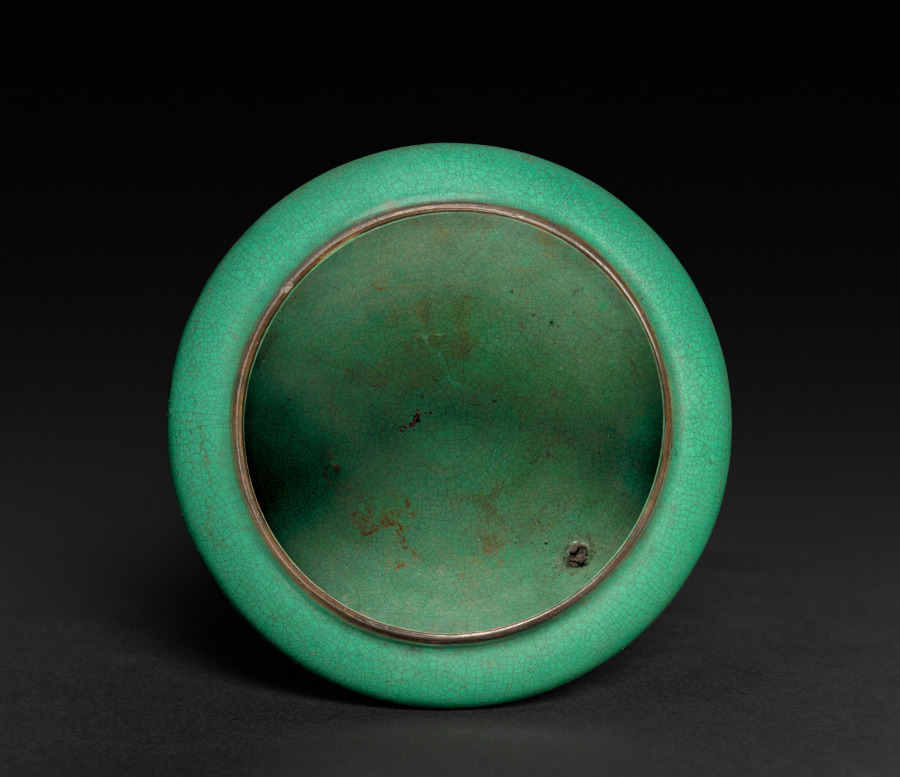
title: Flattened Globular Bowl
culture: China, Qing dynasty (1644-1911), Kangxi reign (1661-1722)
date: 1661–1722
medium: porcelain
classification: Ceramic